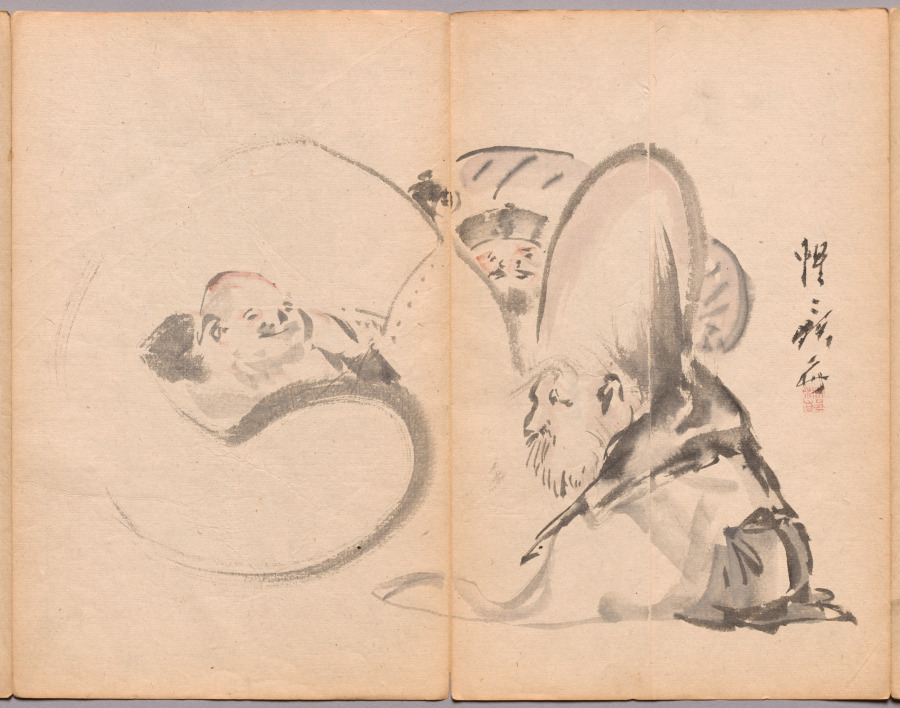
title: Gods of Good Fortune from Sketch Album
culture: Japan, Edo period (1615–1868) to Meiji period (1868–1912)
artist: Kawanabe Kyōsai (Japanese, 1831–1889)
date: mid- to late 1800s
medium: Accordion-style book of 26 double-leaves; ink and color on paper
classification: Bound Volume